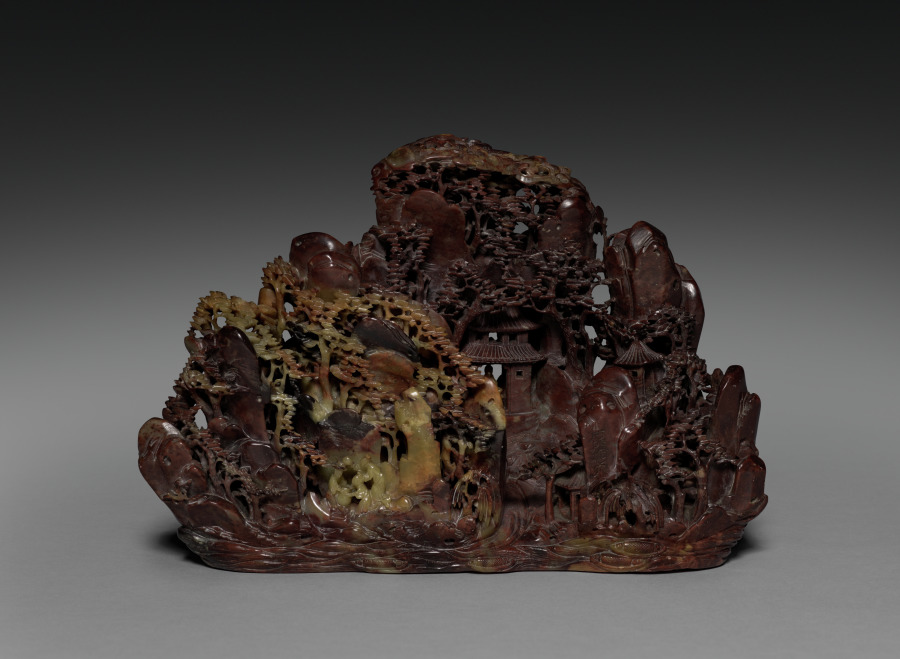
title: Landscape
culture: China, Qing dynasty (1644-1911)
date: 1644–1911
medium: soapstone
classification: Stone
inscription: 石門洞天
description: A mountain scenery surrounded by water and fish is meticulously carved out of soapstone, with a pond, bridge, waterfall, and temple front in its center. The unidentified figure scene on the left includes an ox and a man wearing what appears to be a Korean hat. A Buddha figure hidden in the depth of the temple can be glimpsed from the backside. The inscribed pillar on the right reads “Stonegate Cave to Heaven (shimen dongtian)”. Indentations all over the stone suggest that the miniature mountain was once adorned with precious stones and metal, presumably representing an earthly paradise to which one could escape in one’s mind and imagination.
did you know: A waterfall plummets down the cliff by the temple and then flows smoothly down to join the river at the front of the landscape scene.